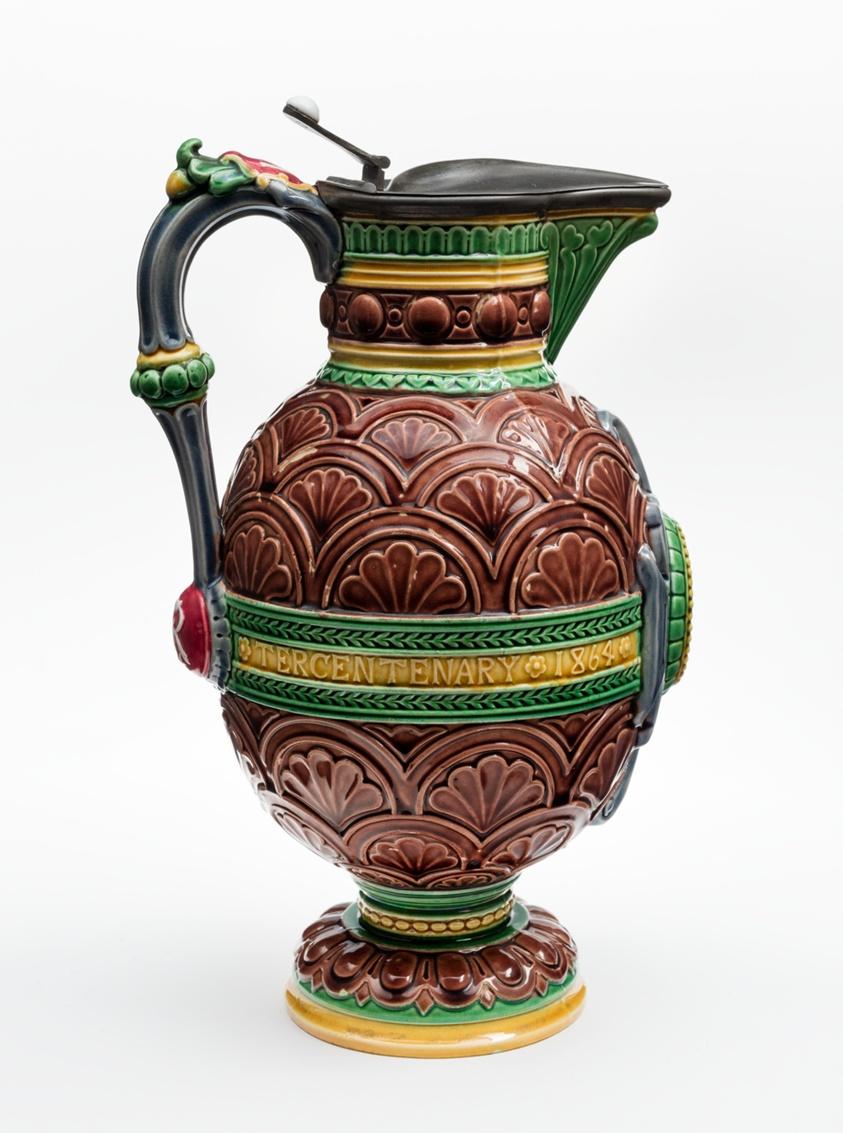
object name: Ceramics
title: Shakespeare Ewer and Basin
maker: Minton Pottery and Porcelain Factory; Stoke-on-Trent, England, founded 1793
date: Ewer: 1873, Basin: 1871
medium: Tin glazed earthenware with pewter mounts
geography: England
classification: ceramics